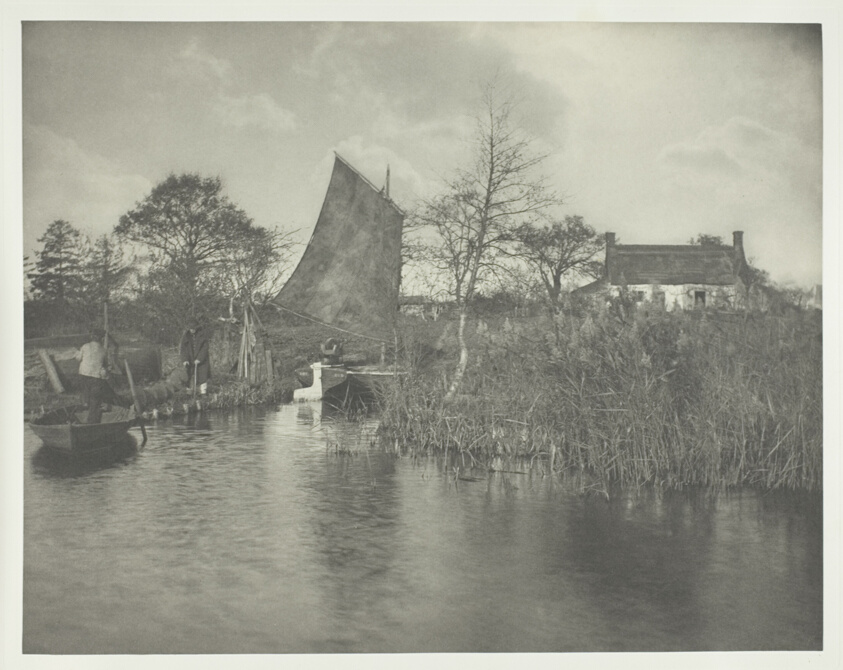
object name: Photograph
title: A Broadman's Cottage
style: 19th century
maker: Peter Henry Emerson (English, born Cuba, 1856–1936)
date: 1886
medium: Platinum print, pl. III from the album "Life and Landscape on the Norfolk Broads" (1886)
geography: England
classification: platinum print; photographic process; photography; photograph